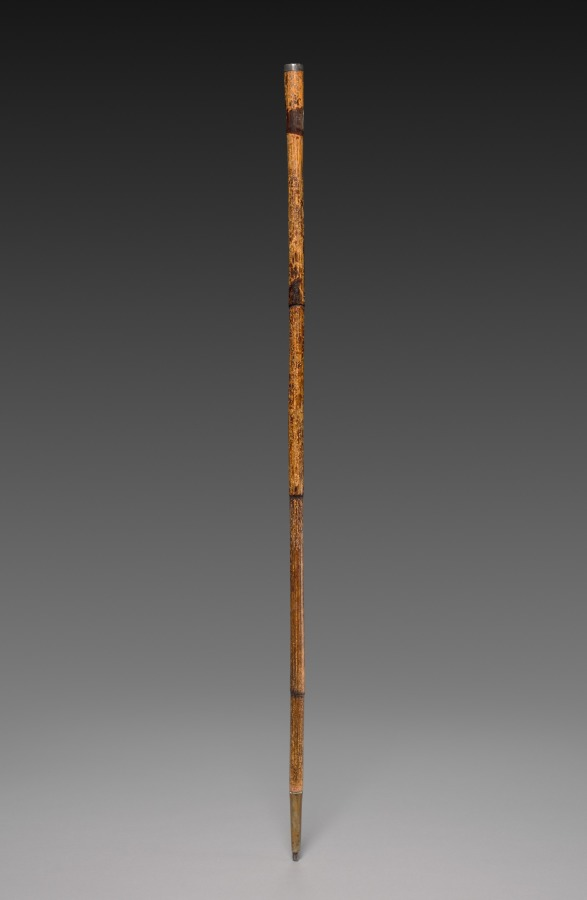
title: Walking Stick of Moses Seymour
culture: America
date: 1774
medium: wood and metal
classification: Miscellaneous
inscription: Entwined initials on top of handle; inscribed on edge: "Moses Seymour 1774"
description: At the age of fifteen, Moses Seymour Jr., sat for a portrait that honors both its sitter and implicitly, his father, the former Revolutionary War major from Litchfield, Connecticut, who commissioned this work. Like so many American painters of his generation, Earl studied with Benjamin West in London. Upon his return, he practiced his profession in his native Connecticut River Valley. Seymour's book and cane suggest that the young man reads and walks in harmony among nature's beauties, an activity that recalls the ideals of the ancient Roman poet Horace. In a pose that presses him close to the foreground, however, this cultured figure also conveys a message about man's domination over nature. The painting remained in the sitter's family until it was given to the museum.